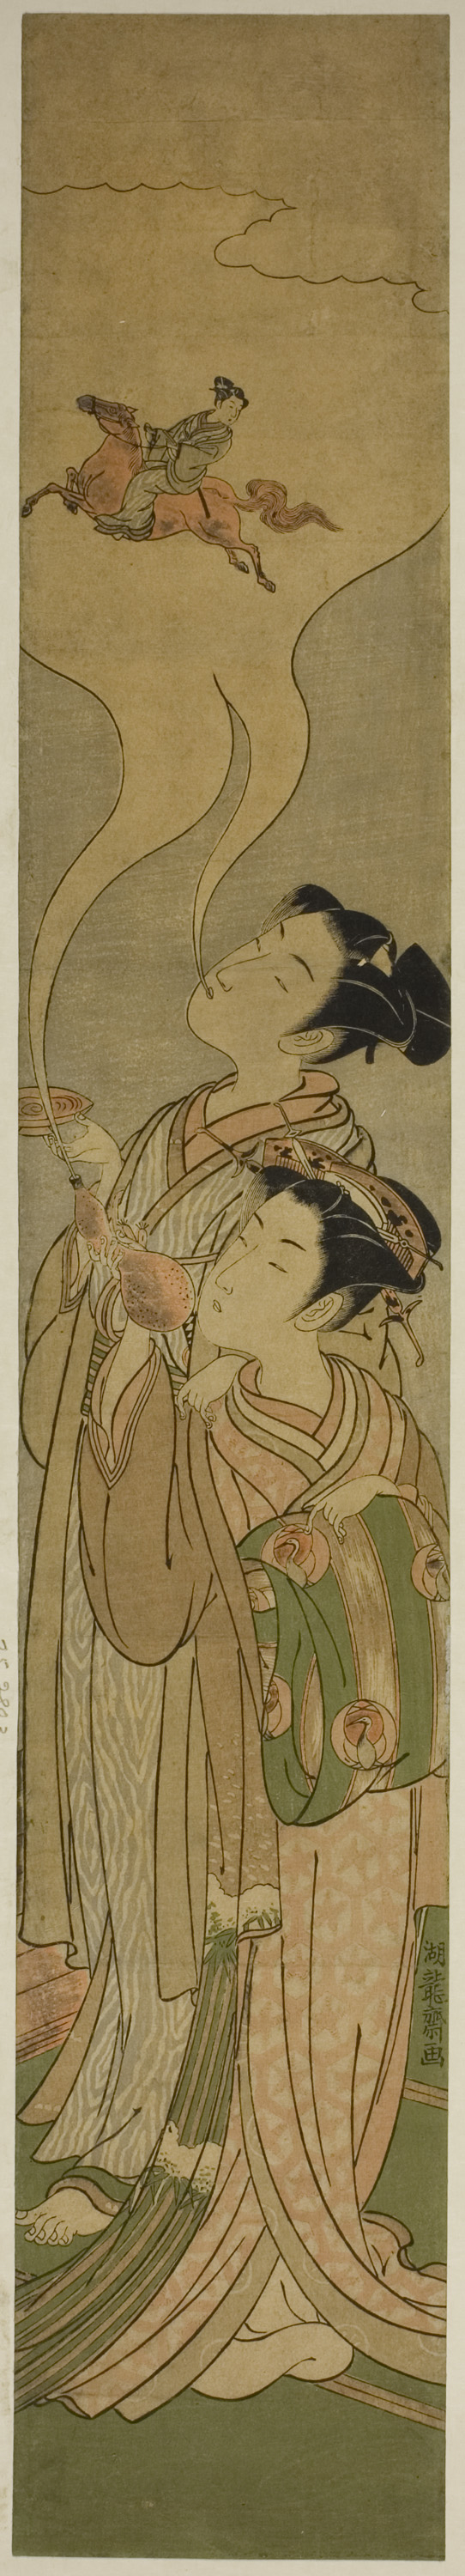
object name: Print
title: Couple Conjuring Up a Horse and Rider (parody of Tekkai [Chinese: Li Tieguai] and Chokaro [Chinese: Zhang Guo Lao])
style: Japanese (culture or style)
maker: Isoda Koryusai (Japanese, 1735-1790)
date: c. 1772/81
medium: Color woodblock print; hashira-e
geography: Japan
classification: woodblock print; print; asian art